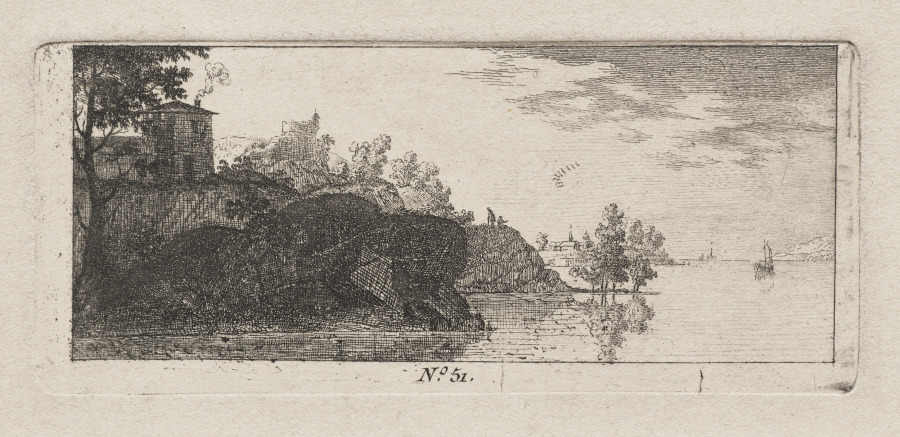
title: Cottage on a Rocky Promentory along a River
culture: France, 18th century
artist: Antoine de Marcenay de Ghuy (French, 1724–1811)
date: 1778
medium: etching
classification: Print